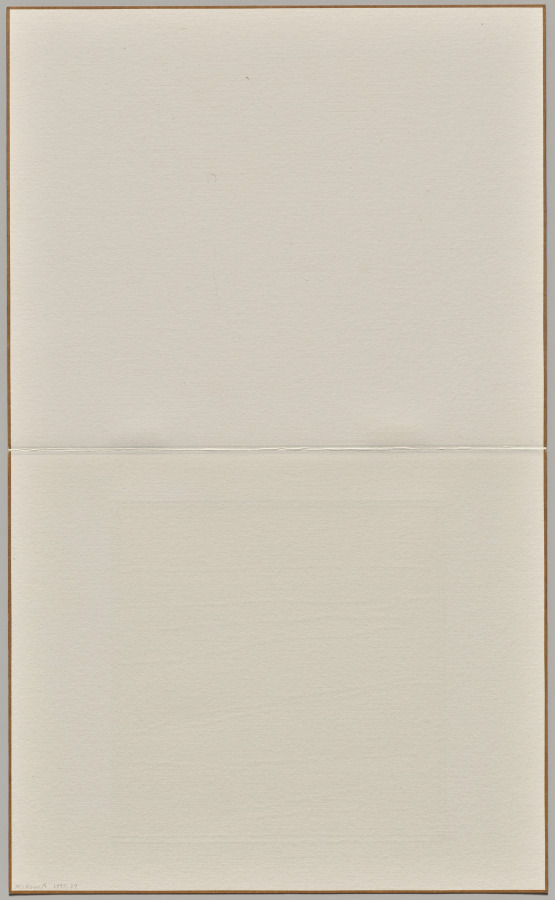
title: Magpies and Wild Rabbits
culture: China, Song dynasty (960-1279)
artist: Li Yong (Chinese, active 1200s)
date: 1200s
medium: album leaf, ink and light color on silk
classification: Painting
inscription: 1 official seal of Ming Dynasty.